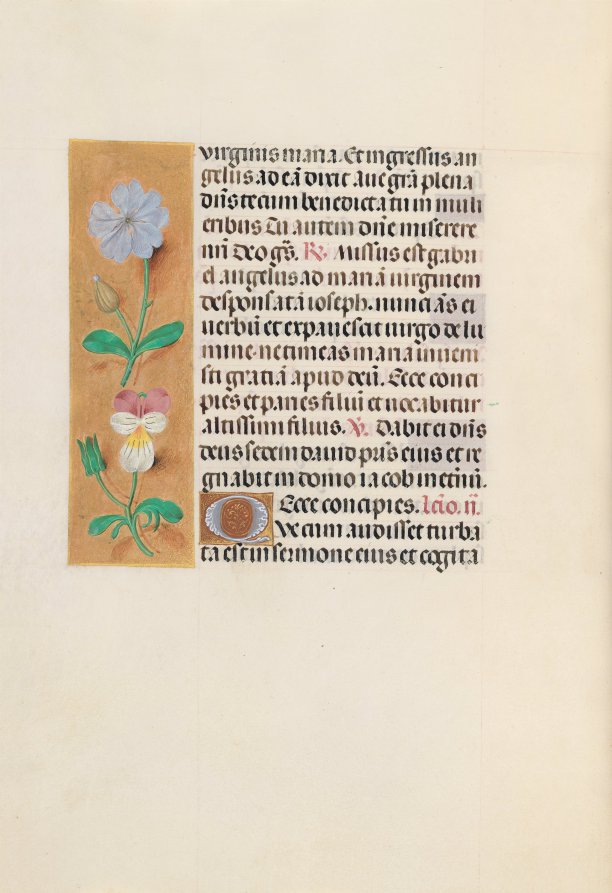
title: Hours of Queen Isabella the Catholic, Queen of Spain: Fol. 162v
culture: Flanders, Ghent and Bruges, late 15th century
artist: Master of the First Prayerbook of Maximillian (Flemish, c. 1444–1519)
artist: and Associates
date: c. 1500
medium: ink, tempera, and gold on vellum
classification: Bound Volume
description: This manuscript was illuminated by a circle of at least five highly organized manuscript painters active in the Flemish cities of Ghent and Bruges. The principal illuminator was Alexander Bening, who painted the majority of the book's miniatures. Manuscripts produced by this circle of artists are renowned for the decoration of their borders, which typically feature a rich variety of realistically-painted flowers, birds, and butterflies. This prayer book, called a book of hours, was intended not for a cleric, but for the private devotions of a lay person-in this case, Isabella the Catholic, Queen of Spain (1451-1504). Isabella's coat of arms embellishes the book's frontispiece. It is unlikely that the book was commissioned by the Queen herself; rather, she probably received it as a diplomatic gift from someone courting her patronage, perhaps Cardinal Francisco Jimenez de Cisneros. A Franciscan friar, Jimenez was dependent upon Isabella for his advancement, first to the post of Queen's confessor in 1492, and then to Archbishop of Toledo in 1495.